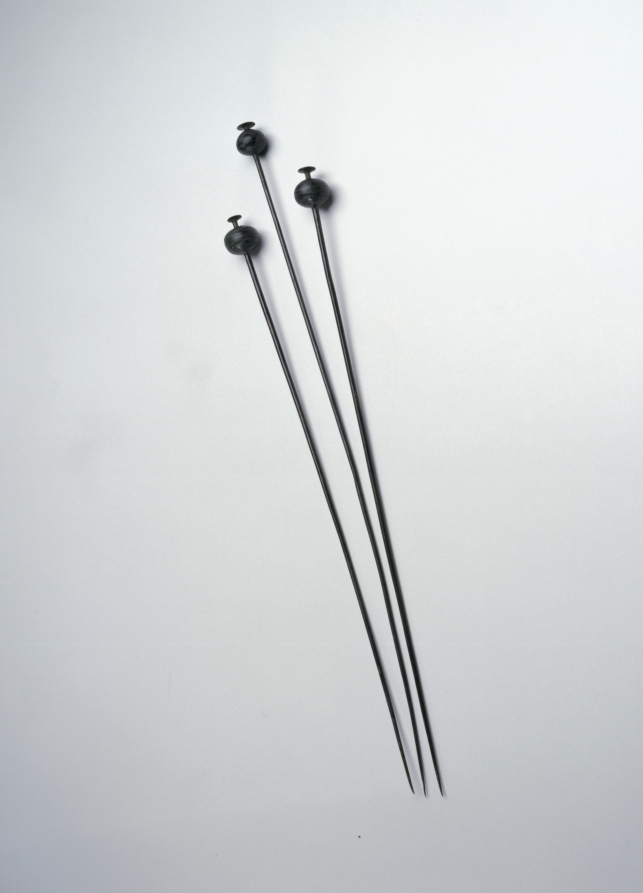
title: Garment Pin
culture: possibly Hungary, Bronze Age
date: c. 1400 BCE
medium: cast and wrought bronze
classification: Jewelry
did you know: This metal pin was used to fasten clothing.